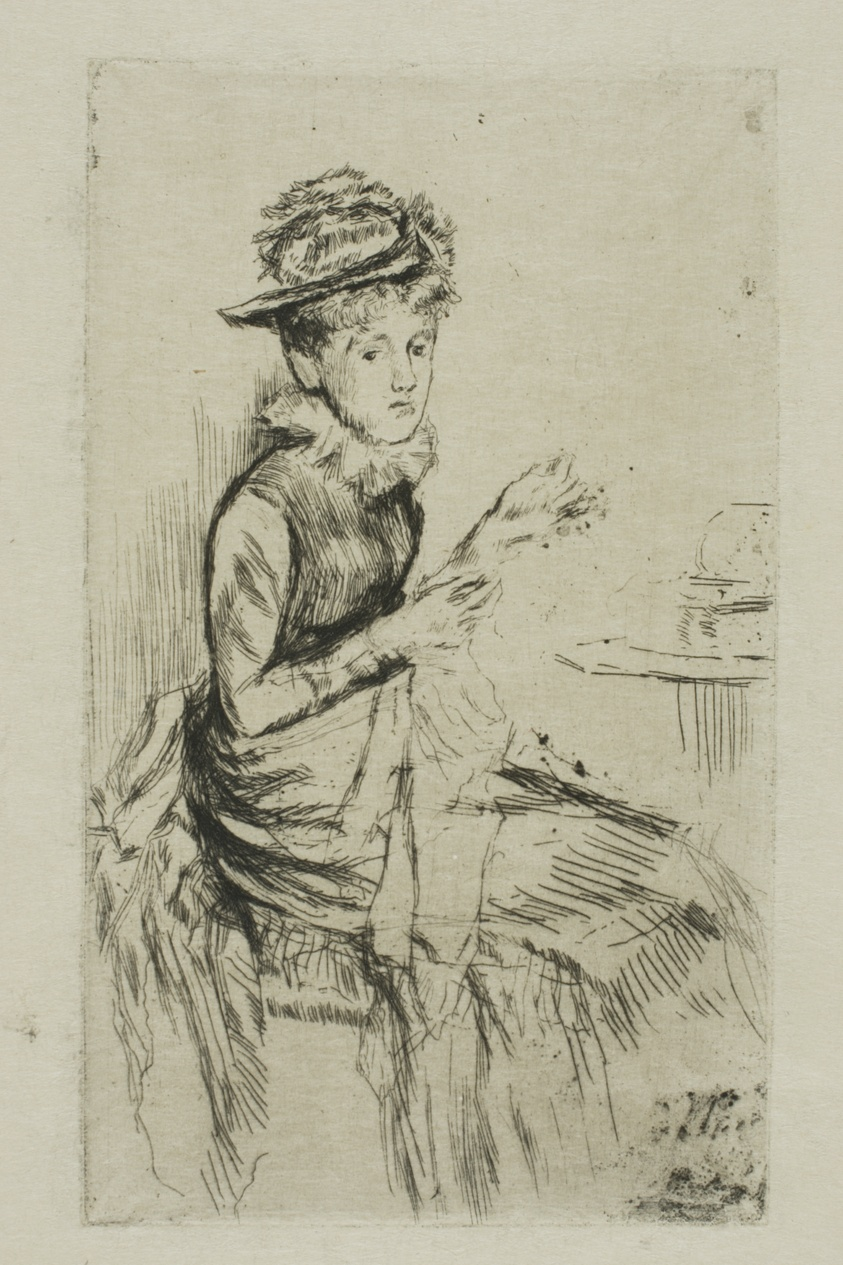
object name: Print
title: Tatting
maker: James McNeill Whistler (American, 1834-1903)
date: 1874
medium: Etching with foul biting in black ink on cream Japanese paper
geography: United States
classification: etching; foul biting; print; prints and drawing; paper